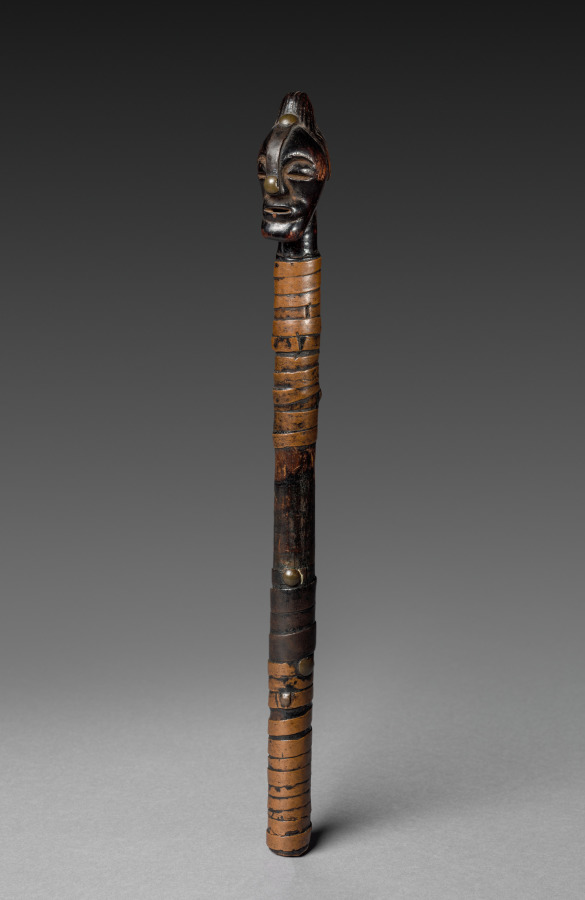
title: Fragment of a Staff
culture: Africa, Central Africa, Democratic Republic of the Congo, Kalundwe, unknown maker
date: late 1800s–early 1900s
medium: Wood, copper alloy, upholstery studs, and iron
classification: Implements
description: Though modest in scale and fragmentary in that its blade is missing, this is perhaps one of the finest surviving examples of a sculptural object in the little-known style of the Kalundwe people. It represents a poorly documented culture's artistic style that sits between the Songye to the west and the Luba to the east. Showing surface traces of continuous manipulation, the shaft of this short staff is entirely wrapped with a copper sheet, a common feature of rank emblems. Originally, it would have had an iron blade projecting from its mouth. However, rather than serving as a functional tool for carving, it would be hung over the shoulder to signal the high rank of its owner, be it a chief, another dignitary, or even a sculptor.